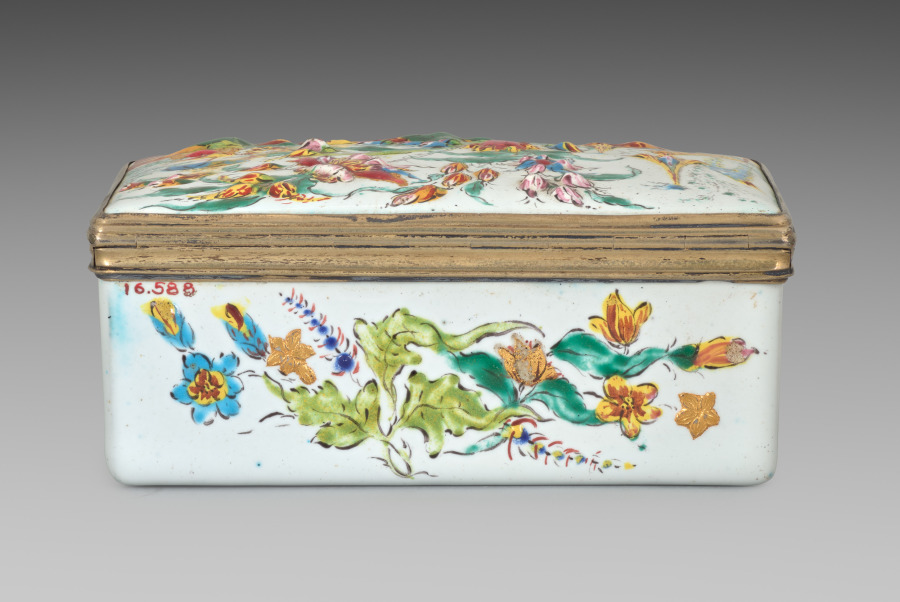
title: Box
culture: France, 18th century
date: 1749–50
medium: silver gilt and enamel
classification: Enamel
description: Chinoiserie in 18th-century France incorporated imitations of East Asian motifs, designs, and ornaments into European art. These imitations were often distorted by the European imagination and were not accurate representations of the cultures from which they drew inspiration. Elements of chinoiserie in this box can be seen primarily on the lid where enormous, vibrantly colored flowers tower over two crouching figures and a grouping of buildings.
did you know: The flower petals on the box lid are raised, an effect produced by drops of transparent enamel placed on the box’s surface that imitates polished gemstones or pearls.